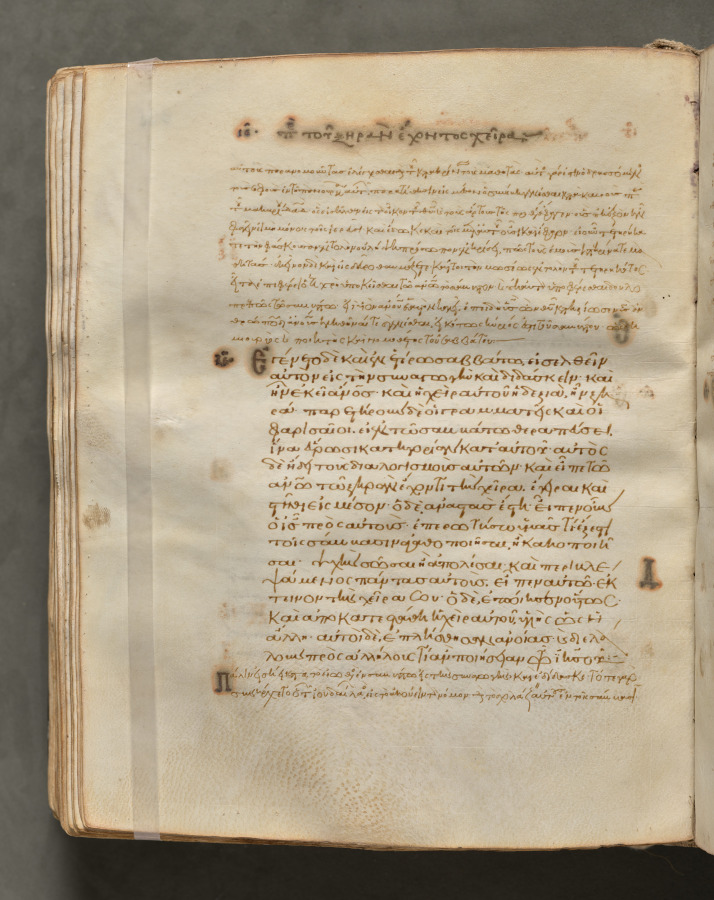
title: Text, folio 226 (verso), from a Gospel Book with Commentaries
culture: Byzantium, Constantinople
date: c. 1000–1100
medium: ink, tempera, and gold on vellum; leather binding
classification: Bound Volume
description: Each of the four gospels in this book opens on a page with brilliantly illuminated borders depicting the author of the text as well as birds-principally peacocks, symbols of the immortality of the soul-and fountains, representing the fountain of life and the salvation of the soul. This volume consists of 428 leaves with texts in Greek. Its level of sophistication suggests that it was probably written and decorated in a monastery in Constantinople.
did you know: Gospel Books were carried in procession through Byzantine churches.